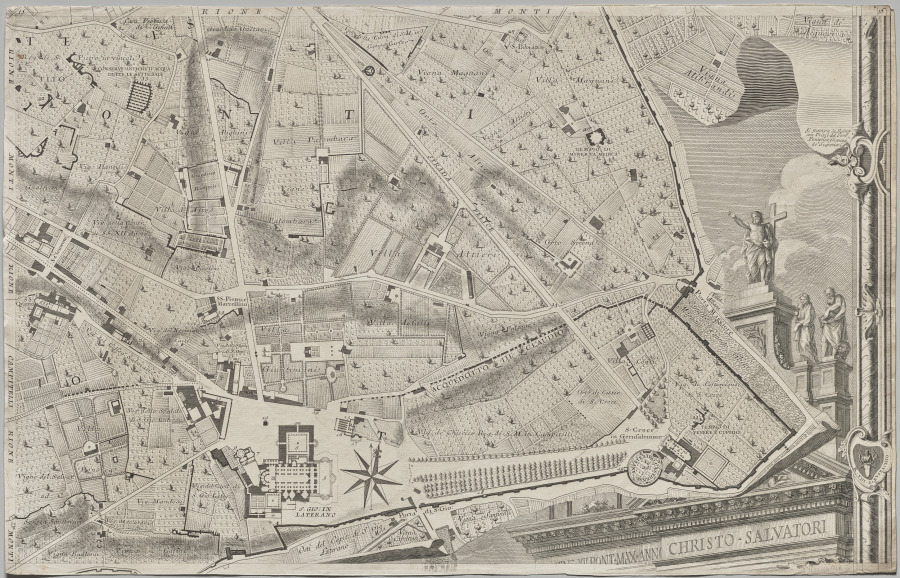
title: Nuova pianta di Roma data in luce da Giambattista Nolli l’anno MDCCXLVII, known as La Pianta Grande di Roma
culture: Italy, 18th century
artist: Giovanni Battista Nolli (Italian, 1701–1756)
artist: Carlo Nolli (Italian, 1690–1790)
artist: Rocco Pozzi (Italian, 1701–1774)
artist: Pietro Campana de Soriano (Italian, 1725–c. 1779)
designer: Stefano Pozzi (Italian, 1699–1768)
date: 1748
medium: etching and engraving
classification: Print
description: The monumental Pianta Grande di Roma, or Large Plan of Rome, which measures about 5 x 7 feet when its twelve plates are assembled, is a landmark in both cartography and printmaking. The map is considered the first scientific rendering of Rome, establishing new standards of accuracy and thoroughness when it was published in 1748. Devised by the Lombard architect and surveyor Giovanni Battista Nolli (Italian, 1701-56), the creation of the map required over ten years of surveying the city carried out by Nolli and a team of assistants with the help of new measuring devices. In Nolli’s “ichnographic” (also called “ground”) plan, architectural features and the urban infrastructure are reduced to a single horizontal slice, a minutely detailed footprint that conveys dimensions, proportions, and orientations to scale with the utmost clarity.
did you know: To make this map, Pope Clement XII granted the mapmaker permission to measure courtyards and other interior, inaccessible spaces in monastic communities, even those in nuns’ convents, which was controversial at the time.